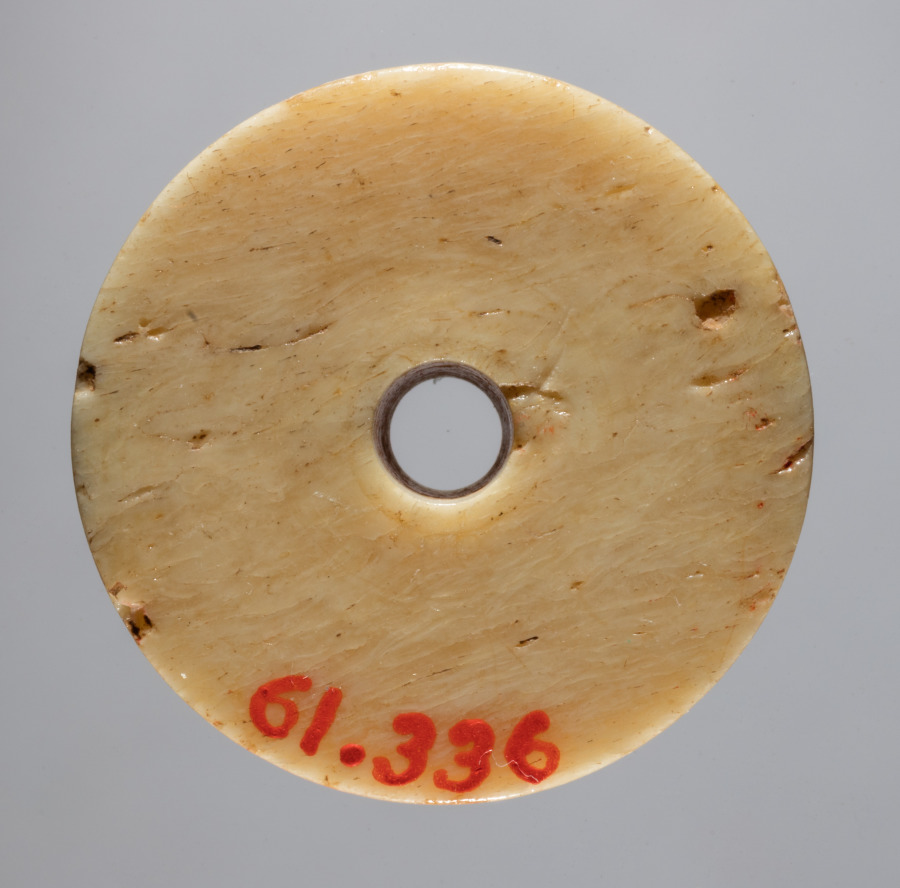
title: Spindle Whorl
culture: Iran, early Islamic period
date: 700s - 900s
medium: bone, incised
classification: Spindle Whorl